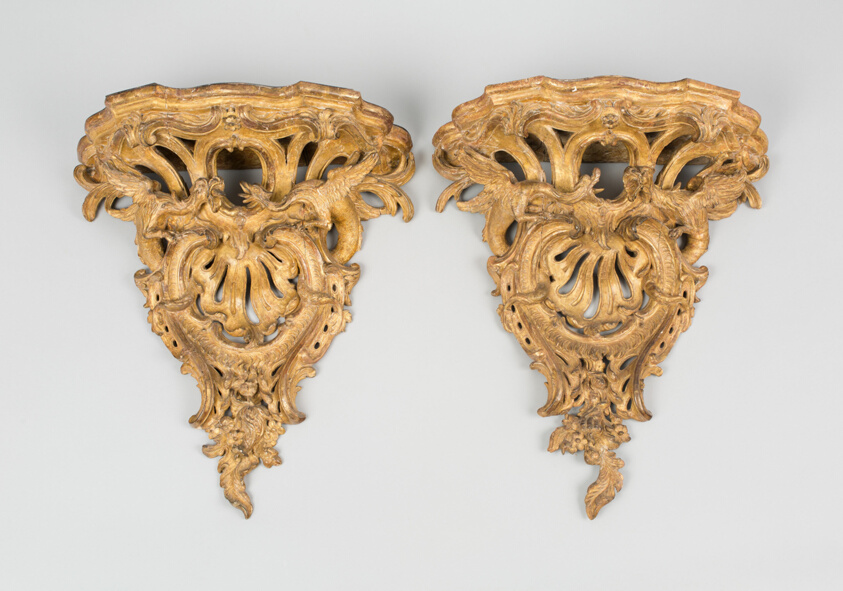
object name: Furniture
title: Bracket (one of two)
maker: France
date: c. 1735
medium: Wood, possibly oak, carved and gilded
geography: France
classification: rack; furniture; european decorative arts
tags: furniture